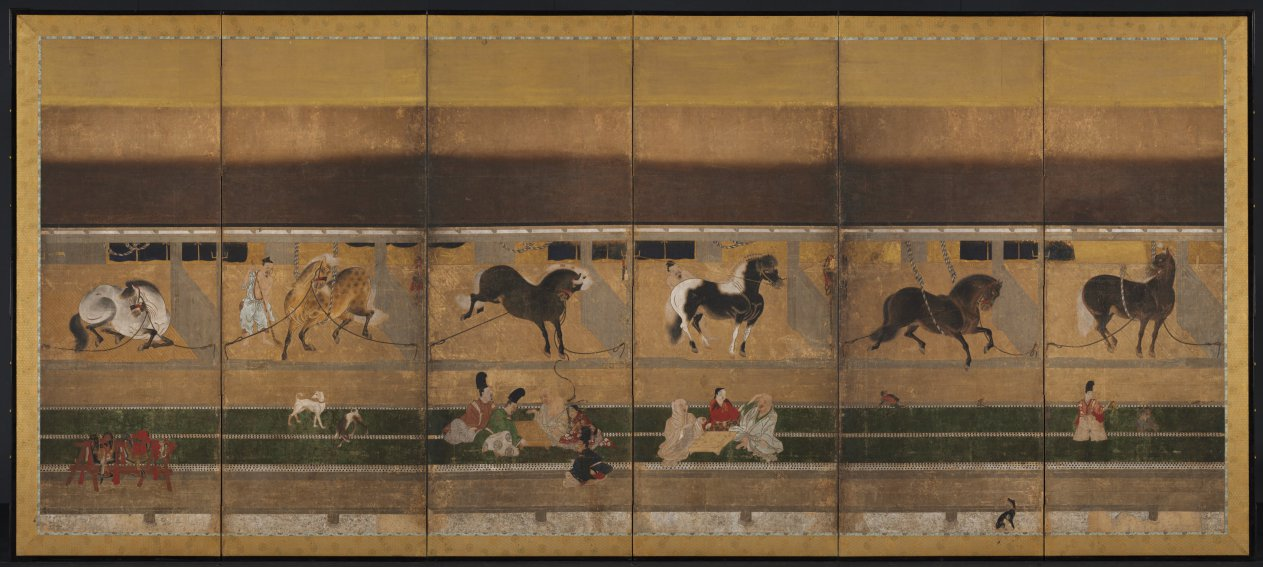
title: Horse Stable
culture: Japan, Muromachi period (1392–1573)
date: early 1500s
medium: One of a pair of six-panel folding screens; ink, color, and gold on paper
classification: Painting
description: Prized horses in stables may be the main theme of the pair of screens to which this screen belongs, but a lot of action is happening on the verandas. Here, people challenge one another at two different board games, go and shōgi. A lively atmosphere develops in the interplay of the dynamic horses and the strategic games.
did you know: Shōgi means "military leader's board game."